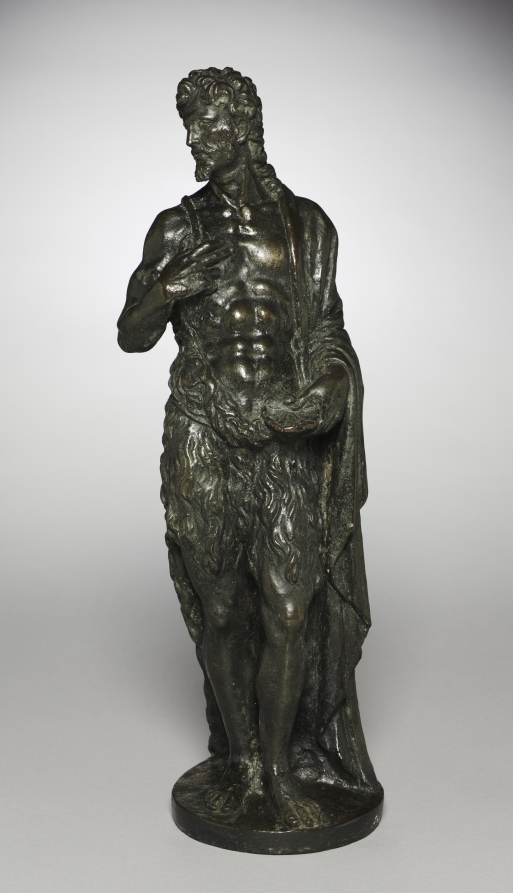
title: Saint John the Baptist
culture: Italy, Verona, 16th century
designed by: Angelo de Rossi (Italian)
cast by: Giuseppe de Levis (Italian, 1605)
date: late 1500s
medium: bronze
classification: Sculpture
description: Saint John wears the hair shirt he fashioned during his retreat into the wilderness to live humbly. He clenches a device of baptism, a shell to pour the water.